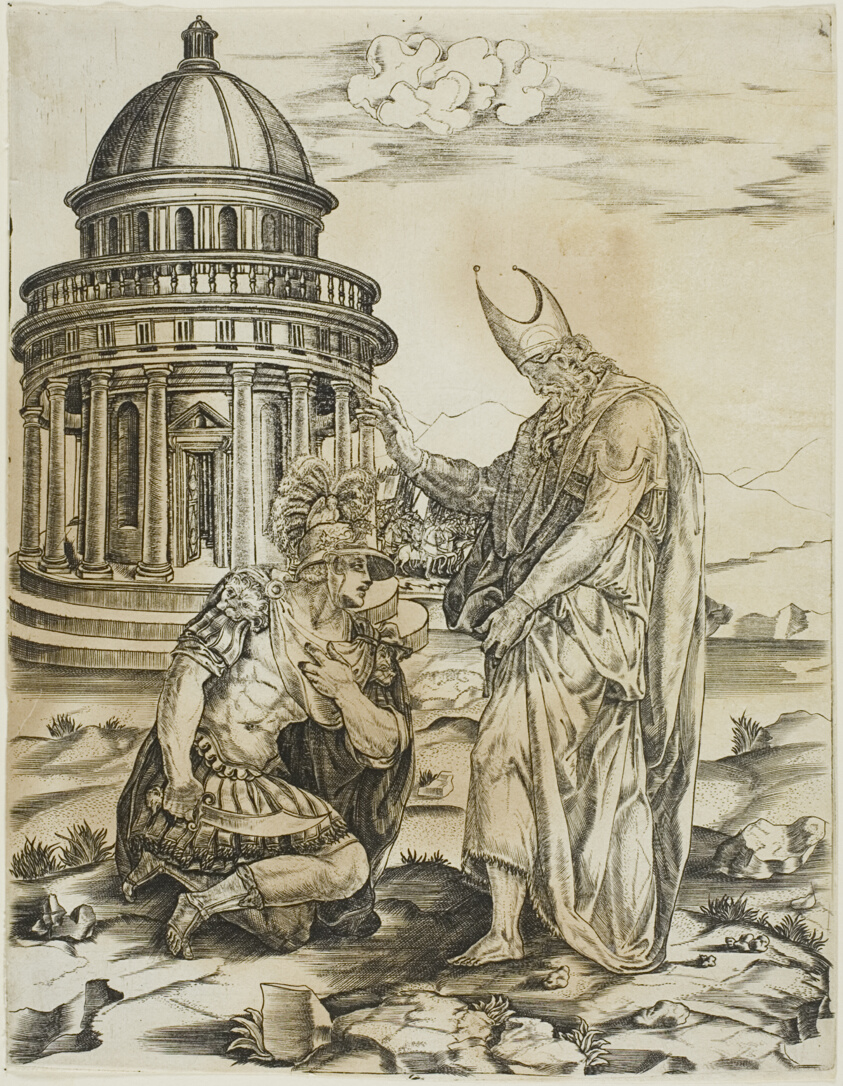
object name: Print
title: St. Ambrose and the Emperer Theodosius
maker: Master IRs (Italian, 16th century)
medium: Engraving on paper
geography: Italy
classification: engraving; print; prints and drawing